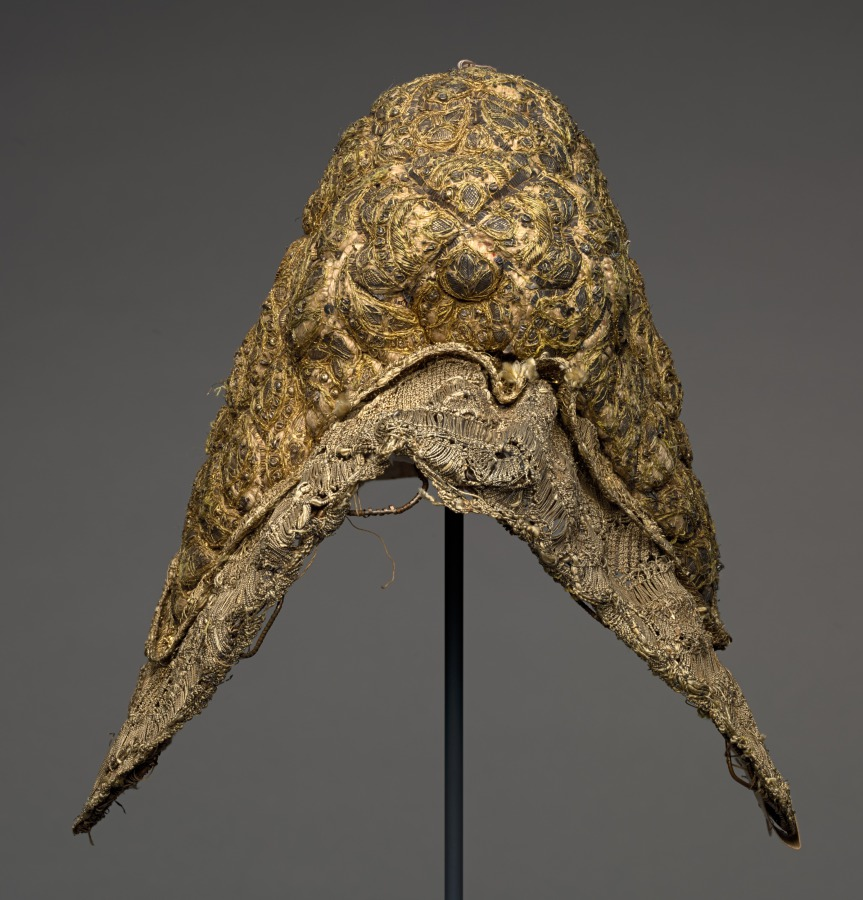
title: Embroidered Peasant Headdress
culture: Germany, Nüremberg, 18th century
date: 1700s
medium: embroidery, gold thread; edged with gold lace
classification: Garment